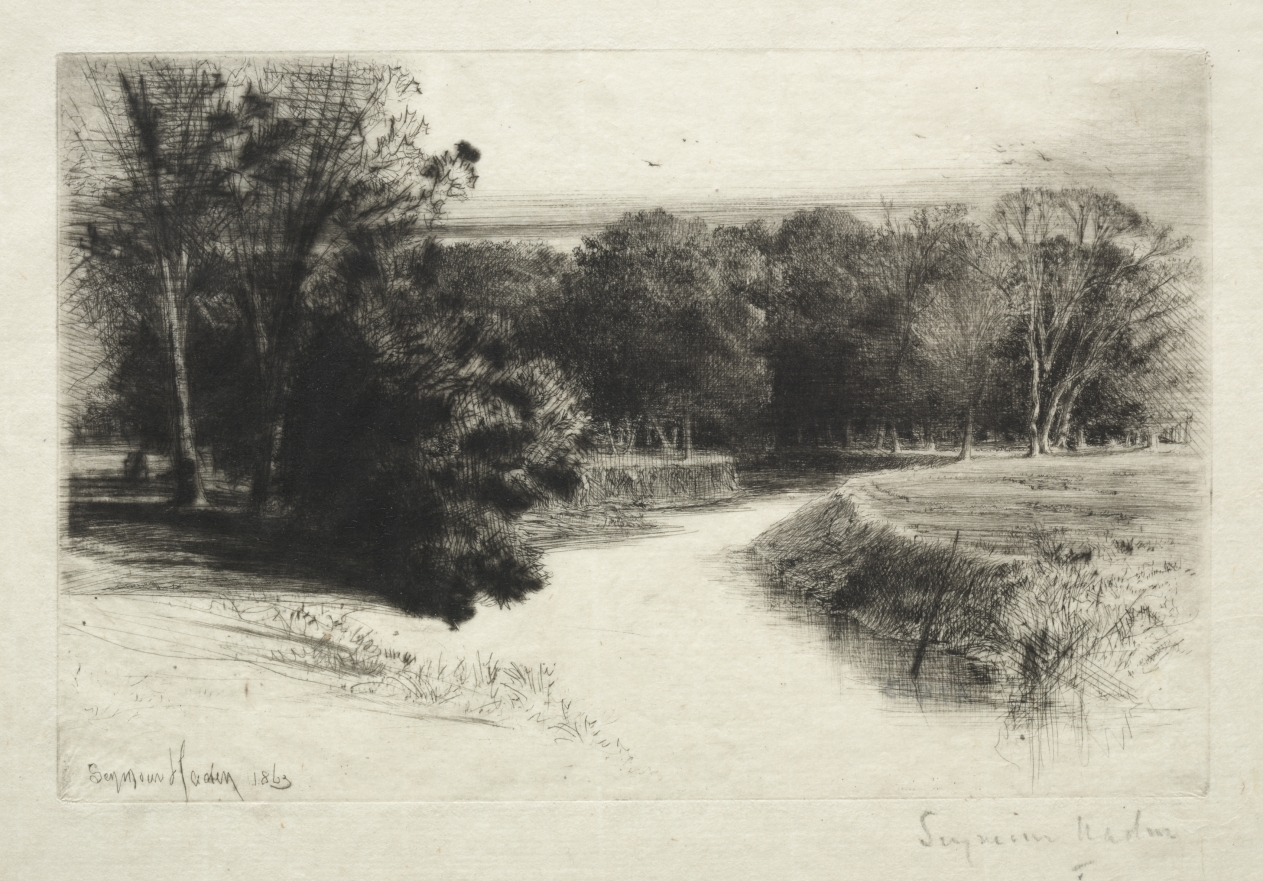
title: A Sunset in Ireland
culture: England, 19th century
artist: Francis Seymour Haden (British, 1818–1910)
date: 1863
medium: drypoint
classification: Print